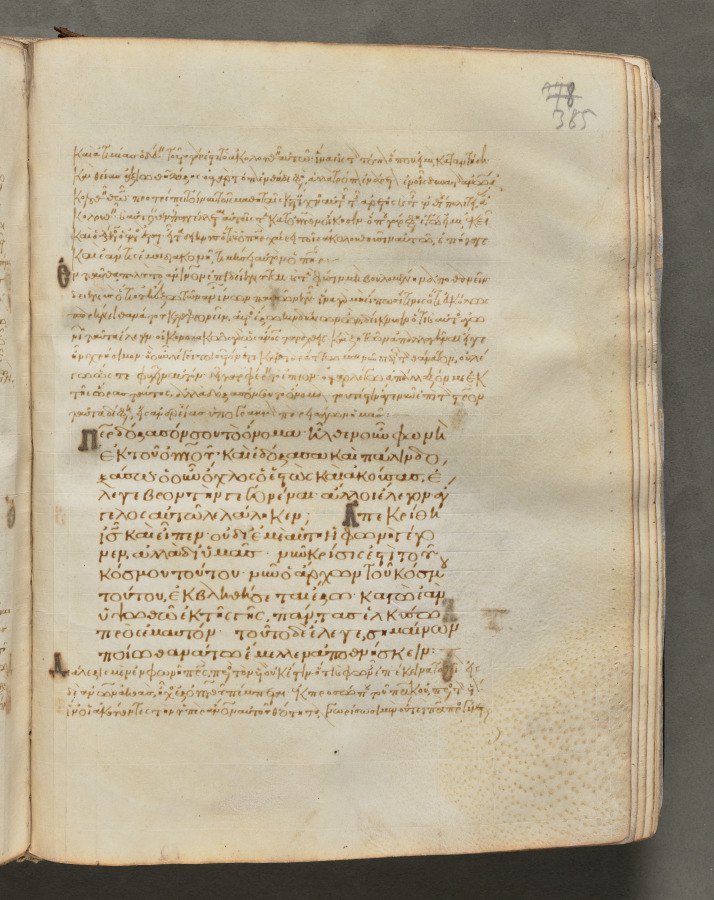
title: Text, folio 385 (recto), from a Gospel Book with Commentaries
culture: Byzantium, Constantinople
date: c. 1000–1100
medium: ink, tempera, and gold on vellum; leather binding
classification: Bound Volume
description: Each of the four gospels in this book opens on a page with brilliantly illuminated borders depicting the author of the text as well as birds—principally peacocks, symbols of the immortality of the soul—and fountains, representing the fountain of life and the salvation of the soul. This volume consists of 428 leaves with texts in Greek. Its level of sophistication suggests that it was probably written and decorated in a monastery in Constantinople.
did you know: Gospel books were carried in procession through Byzantine churches.